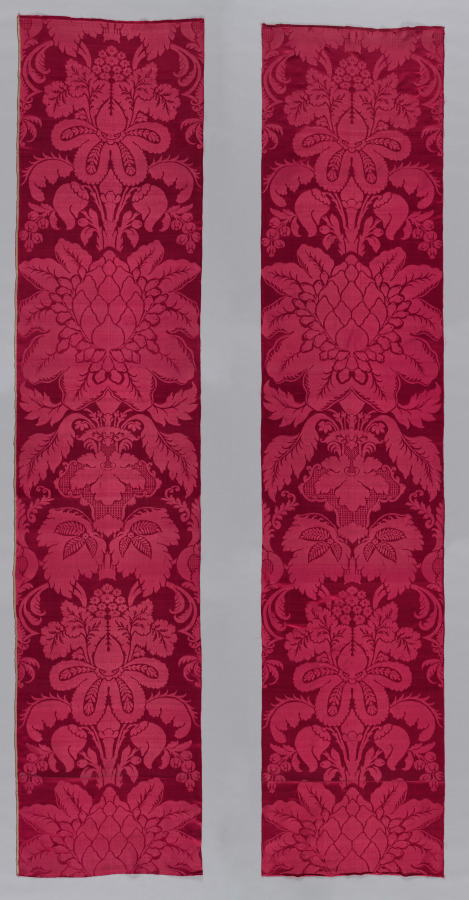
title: Two Large Damask Cloths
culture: Italy, 17th century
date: 1600s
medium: damask, silk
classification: Textile